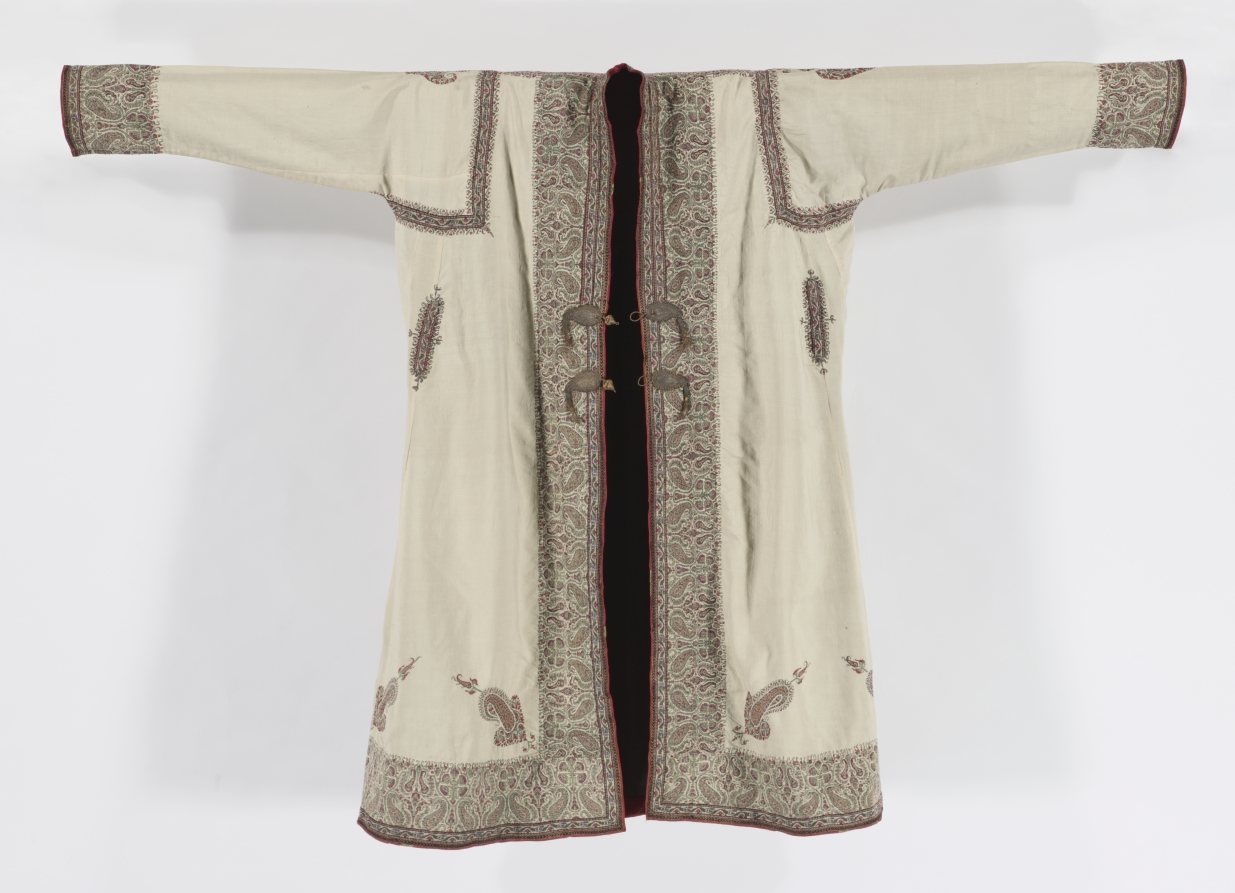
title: Coat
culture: India, Kashmir and probably Avadh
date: early 1900s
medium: wool: embroidery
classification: Garment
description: Coats with a band collar, fastened at the waist, have a Central Asian origin and are known by the Turkish term choga, meaning “long-sleeved garment.” During the mid-1800s, it was fashionable for Indian men of high social status to wear chogas as their outermost layer. The intricate ornamentation in the form of stylized unripe mangoes and flowering plants is the specialty of artisans in Kashmir, where they had access to the fine wool of Himalayan goats. The coats, however, were popular in many regions throughout India.